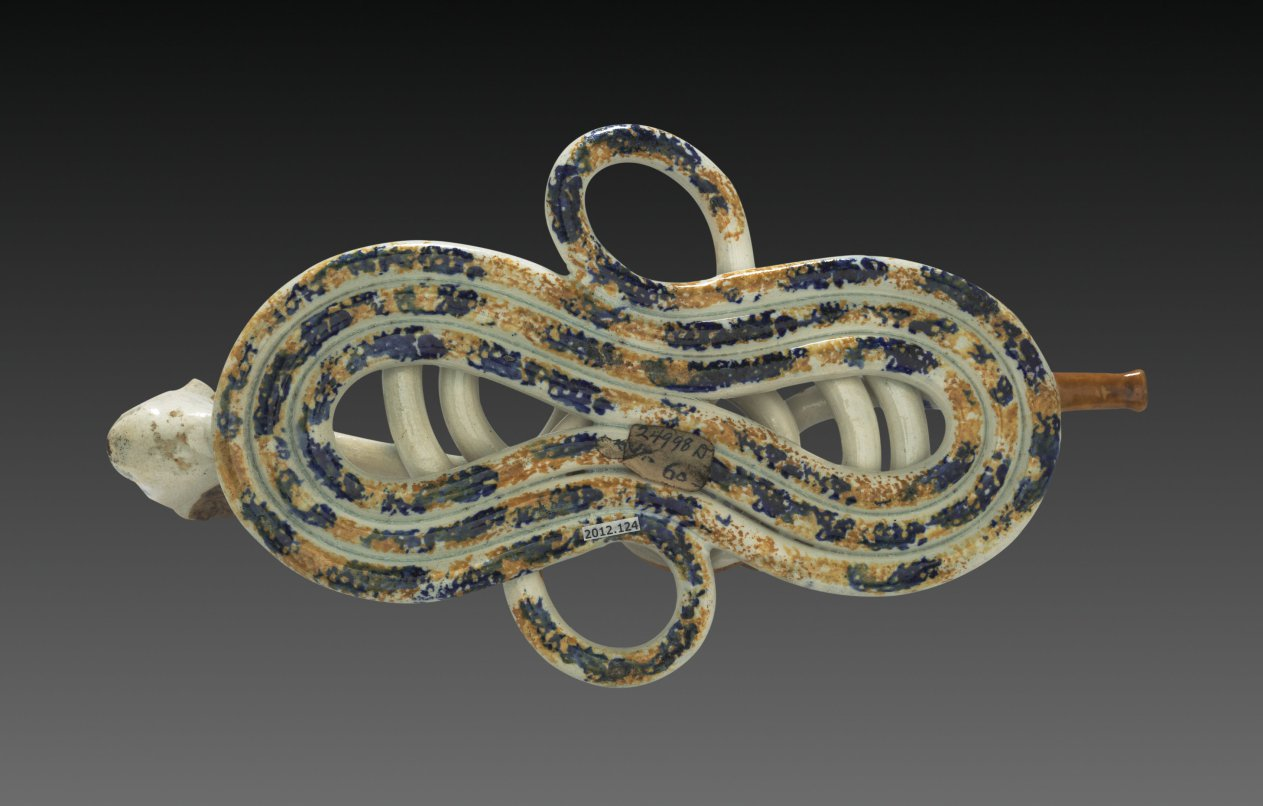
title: Pipe in the Form of a Twisted Man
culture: England, Staffordshire, late 18th-early 19th Century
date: 1780–1820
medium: lead-glazed earthenware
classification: Ceramic